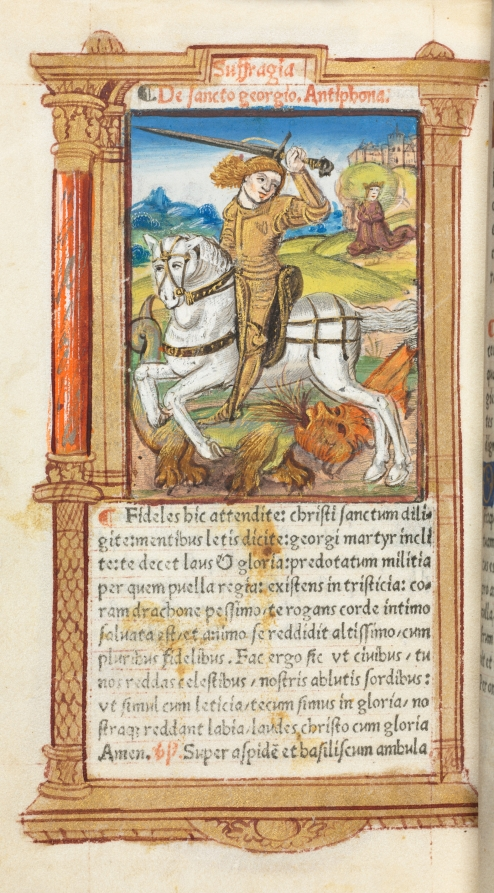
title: Printed Book of Hours (Use of Rome): fol. 103v, St. George Slaying the Dragon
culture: France, Paris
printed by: Guillaume Le Rouge (French, Paris, active 1493–1517)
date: 1510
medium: 112 Printed folios on parchment, bound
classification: Bound Volume